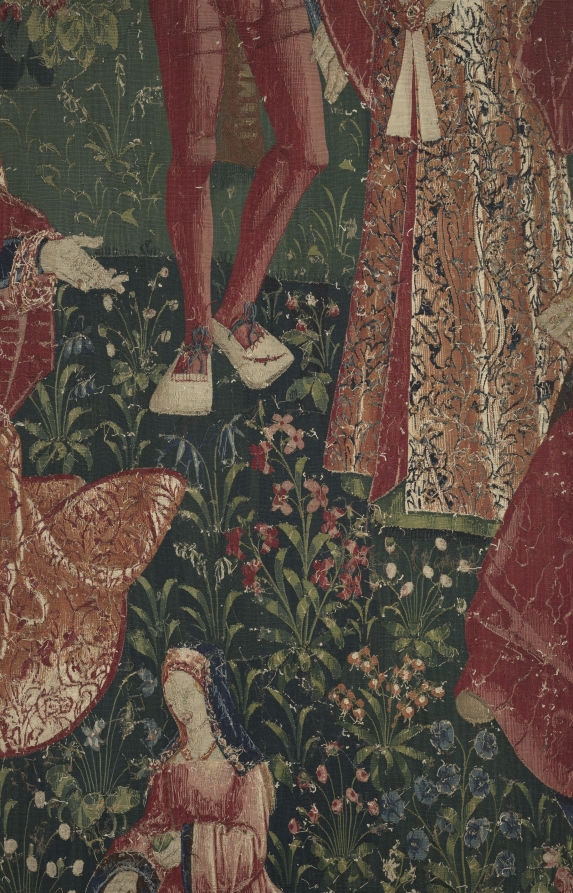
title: Youth (from Chateau de Chaumont set)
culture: France, Lyon(?), early 16th century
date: 1512–15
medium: silk and wool; tapestry weave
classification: Tapestry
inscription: French verse in Gothic letters translates as follows: Youth triumphs while its heart is healthy, And when it seems to hold all in its hand. But this triumph is without eternity. Here one sees the example full well: Those who are happy hide death in thier heart. Let the young heed this warning.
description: Louise of Savoy (1476-1531), queen mother of King Francis I, is depicted here in a sumptuous brocaded velvet in the center. She addresses youthful figures including Éléonore, Pierre Sala’s daughter who is facing her future husband, Hector. On the right, King Louis XII (died 1514) stands in front of the Chateau Langais where he had married Anne of Brittany. Above is Hector’s deceased father with a partially concealed skull under his robe, while a woman expresses surprise at the sight. The verse in Old French at the top states that youthful happiness is not eternal: Youth makes sounds as long as its heart is healthy, And thinks that it holds all in its hand. But this triumph is not eternal. Here you see clearly an example: He that is happy has death in his breast. Of this you people should take note.